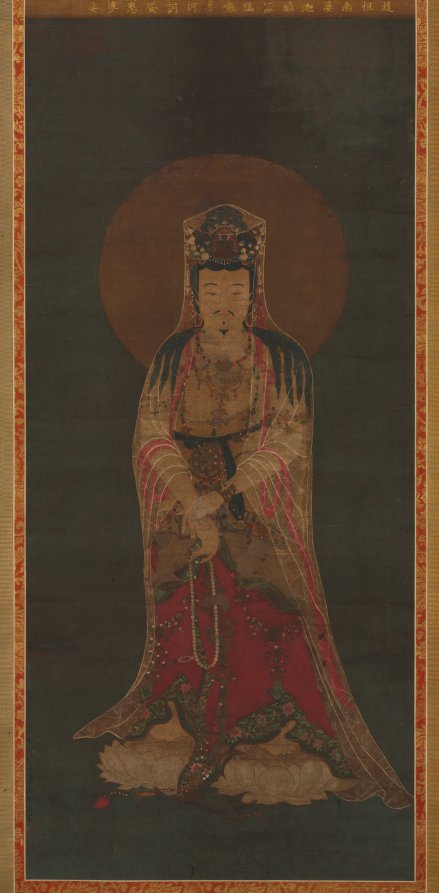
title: Kannon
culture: Japan, Meiji period (1868–1912)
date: c. 1868–1912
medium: hanging scroll; ink and color on silk; inscription in gold ink on silk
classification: Painting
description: The bodhisattva Avalokiteshvara (Kannon in Japanese) stands with each of his feet upon a lotus blossom. The Buddha Amitabha (Amida in Japanese) appears in his headdress. The text written in golden characters attached to the top of the painting is a portion of a religious text extolling the virtues of the bodhisattva. The painter was inspired by Buddhist paintings of the Korean Goreyo period (918–1392); he attempted to reproduce the diaphanous shawl sometimes seen in such early works.